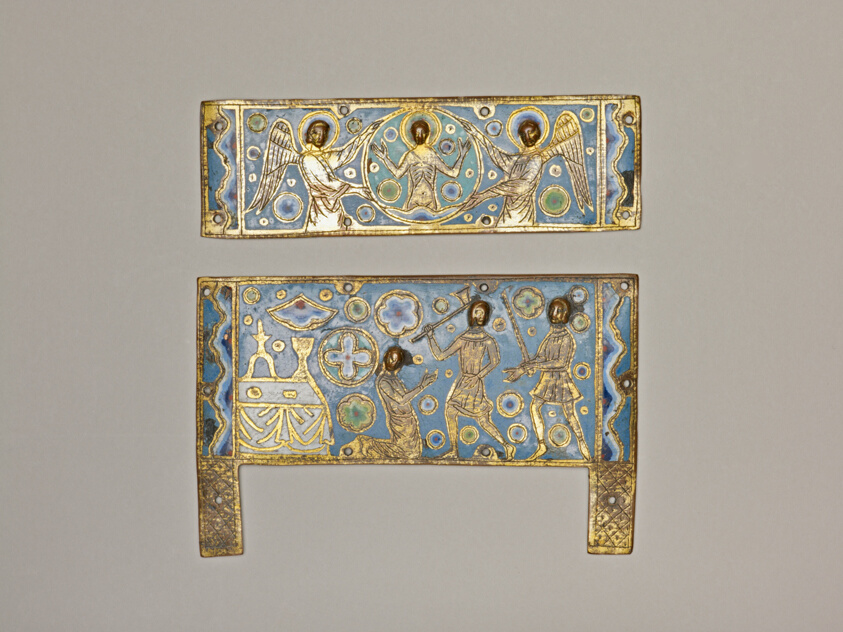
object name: Decorative Arts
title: Plaques from a Reliquary Casket with the Martyrdom of a Saint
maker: French; Limoges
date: 1200/50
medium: Gilt copper, champlevé enamel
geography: Limoges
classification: enamel; european decorative arts; decorative arts